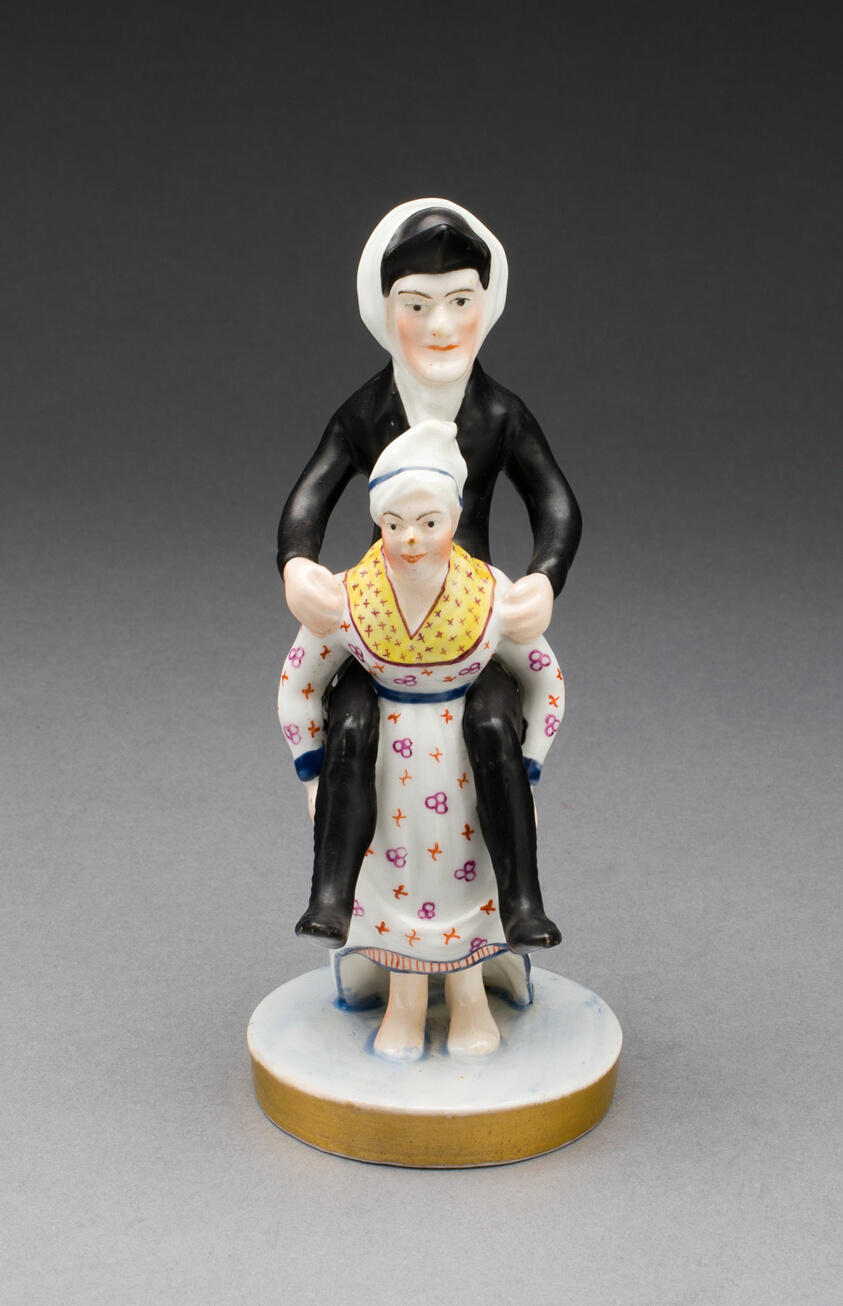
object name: Ceramics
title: Dr. Syntax and the Old Woman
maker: England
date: early 19th century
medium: Soft-paste porcelain, polychrome enamels and gilding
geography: England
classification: porcelain; european decorative arts; ceramics